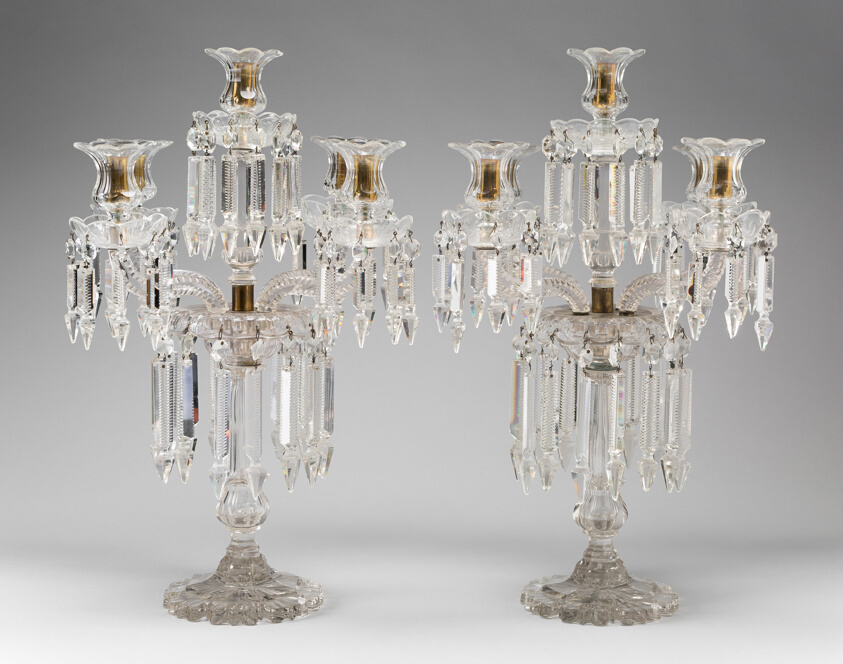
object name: Glass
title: Pair of Candelabra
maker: England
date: 1835/40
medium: Glass and brass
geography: England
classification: candleholder - candelabra; candleholder; glass; european decorative arts